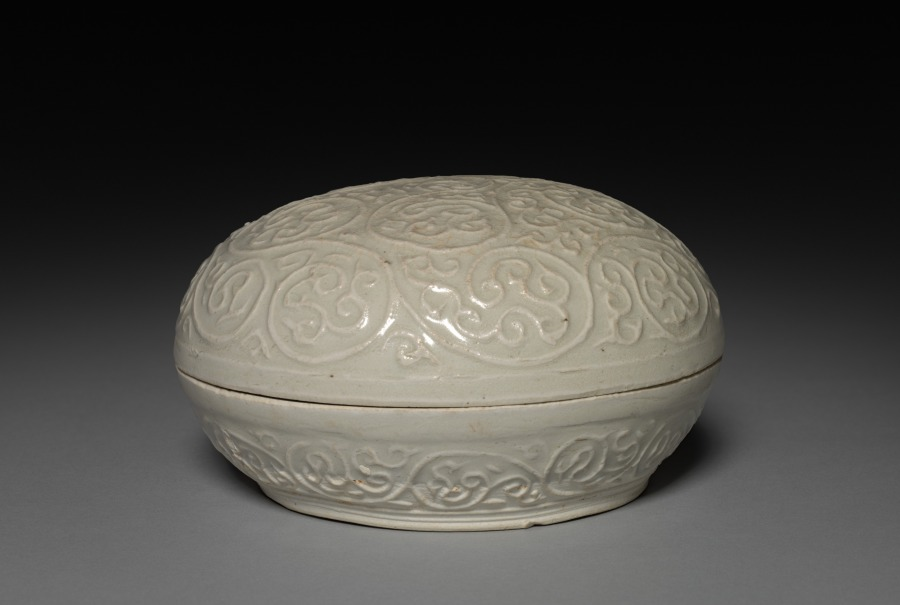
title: Round Covered Box with Floral Scrolls in Relief: Qingbai type Ware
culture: China, Fujian province, Anxi xian, Yuan dynasty (1271-1368)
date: 1300s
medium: glazed porcelain with slip decoration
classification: Ceramic